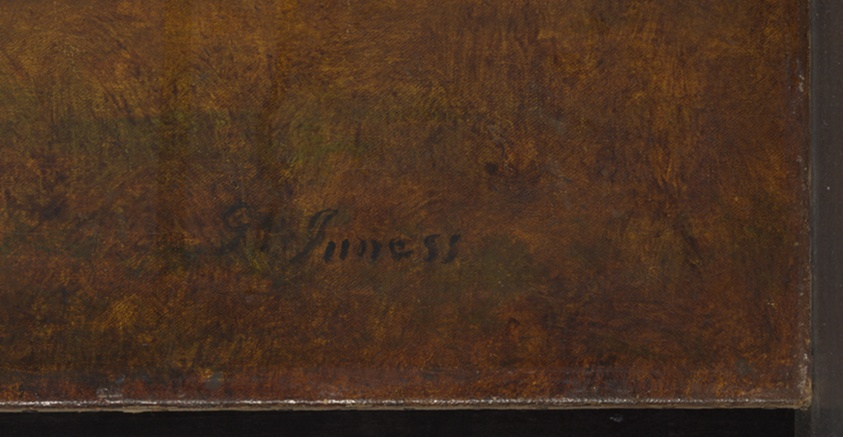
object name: Painting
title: Autumn Woods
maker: George Inness (American, 1825–1894)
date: 1891–94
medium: Oil on canvas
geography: United States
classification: painting; american arts